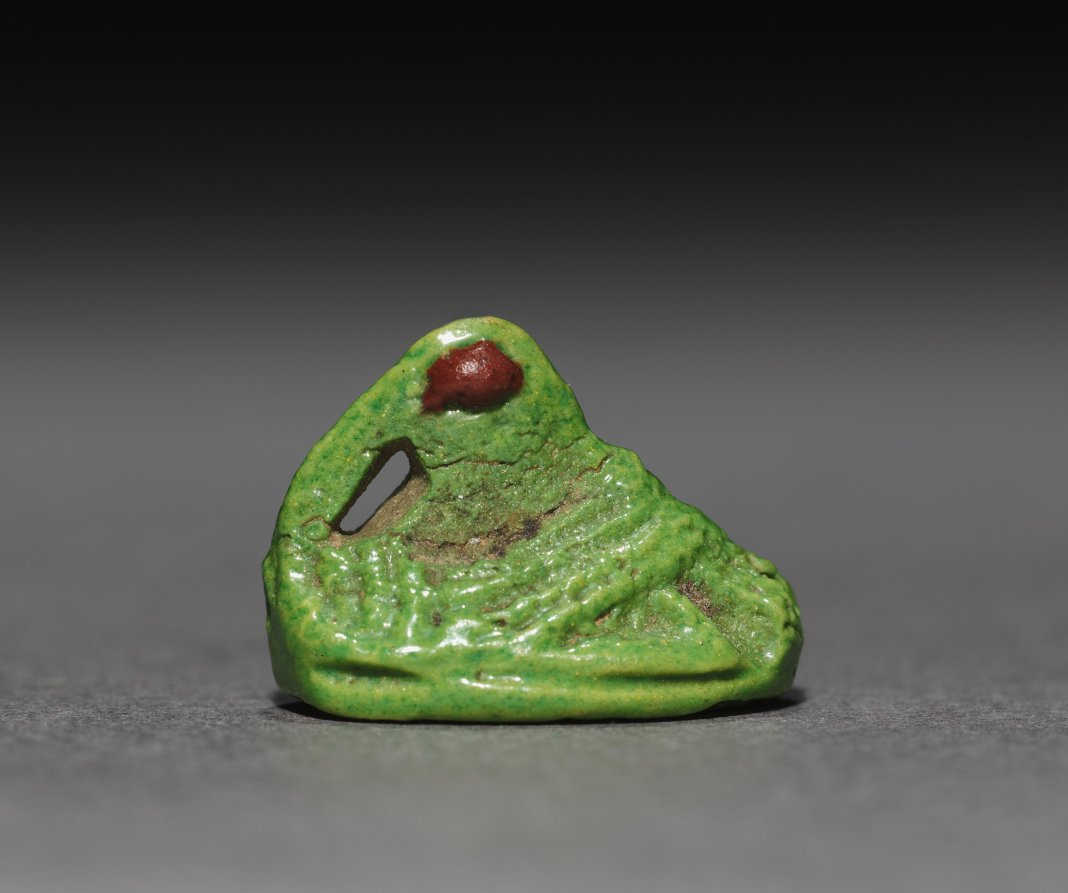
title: Sleeping Duck Amulet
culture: Egypt, New Kingdom (1540–1069 BCE), Dynasty 18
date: 1350–1296 BCE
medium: polychrome faience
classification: Amulets